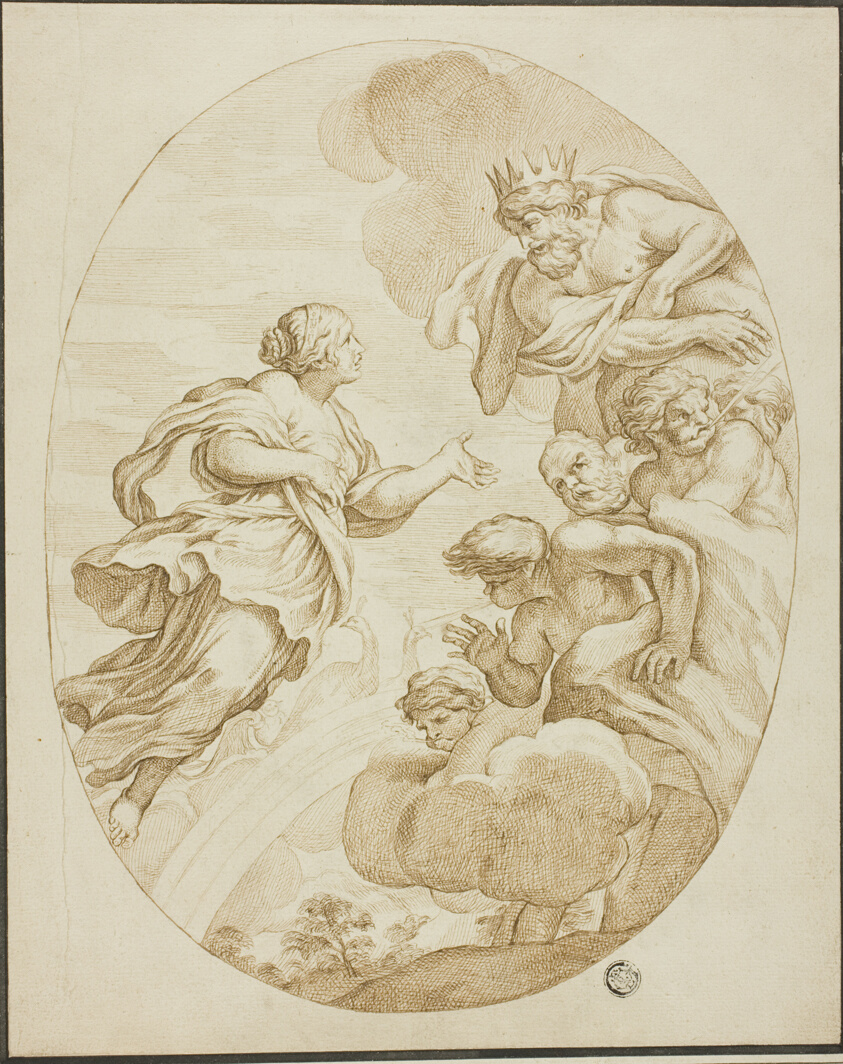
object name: Drawing and Watercolor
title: Juno, Zeus and Aeolus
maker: after Pietro da Cortona; Italian, 1596-1669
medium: Pen and brown ink, on ivory laid paper, laid down on ivory laid paper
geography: Italy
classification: pen and ink drawings; drawings (visual works); prints and drawing